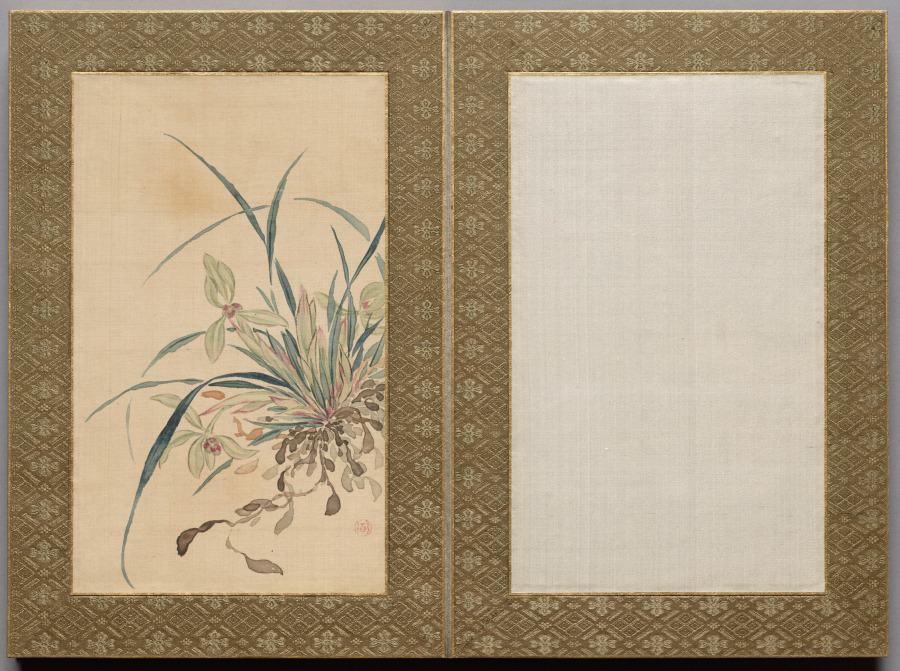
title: Painting from Flowers and Grasses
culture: Japan, Edo period (1615–1868)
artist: Tsubaki Chinzan (Japanese, 1801–1854)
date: 1841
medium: album; ink and color on silk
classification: Painting